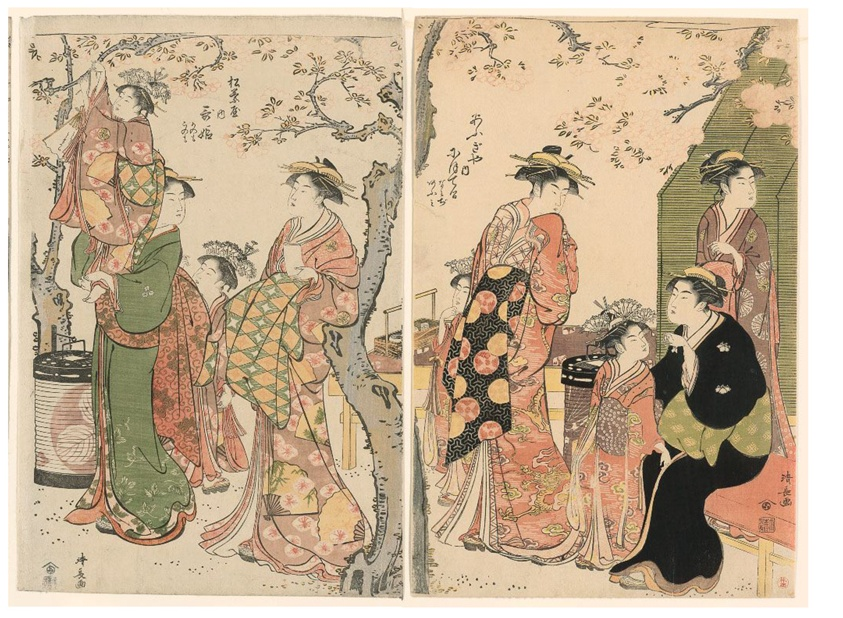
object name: Print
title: Courtesans and Their Child Attendants under Blossoming Cherry Trees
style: Japanese (culture or style)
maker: Torii Kiyonaga (Japanese, 1752-1815)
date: 1785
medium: Color woodblock print; right and center sheets of oban triptych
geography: Japan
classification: print; asian art